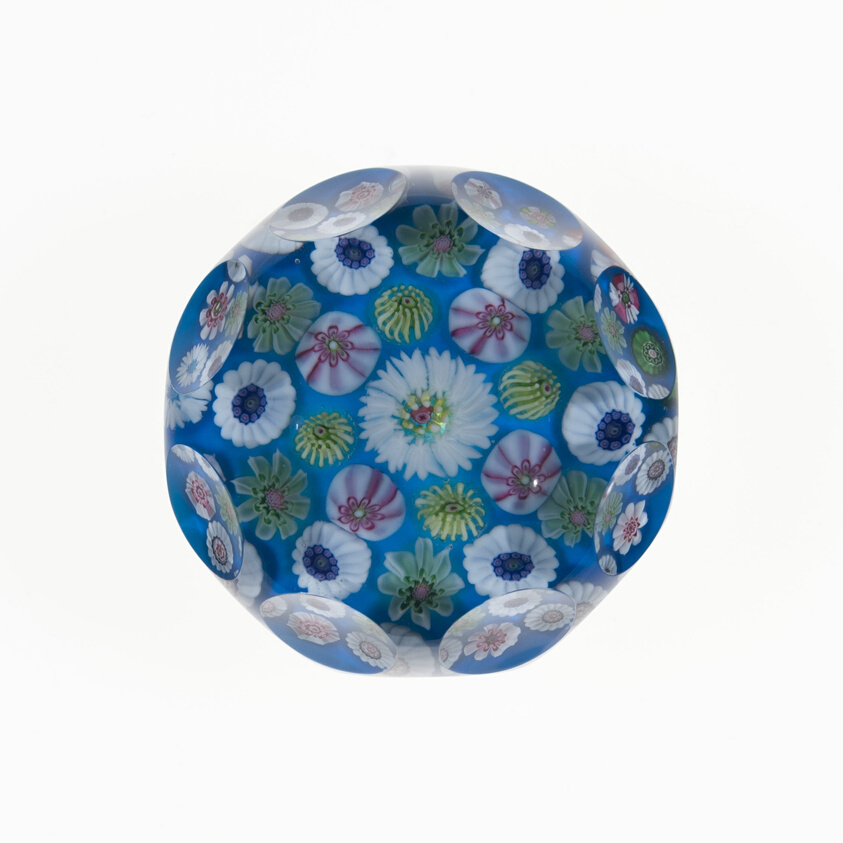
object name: Glass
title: Paperweight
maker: Clichy Glassworks (Cristalleries de Clichy); Clichy, France, 1837-1885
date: 19th century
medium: Glass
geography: Clichy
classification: paperweight; millefiori; european decorative arts; glass